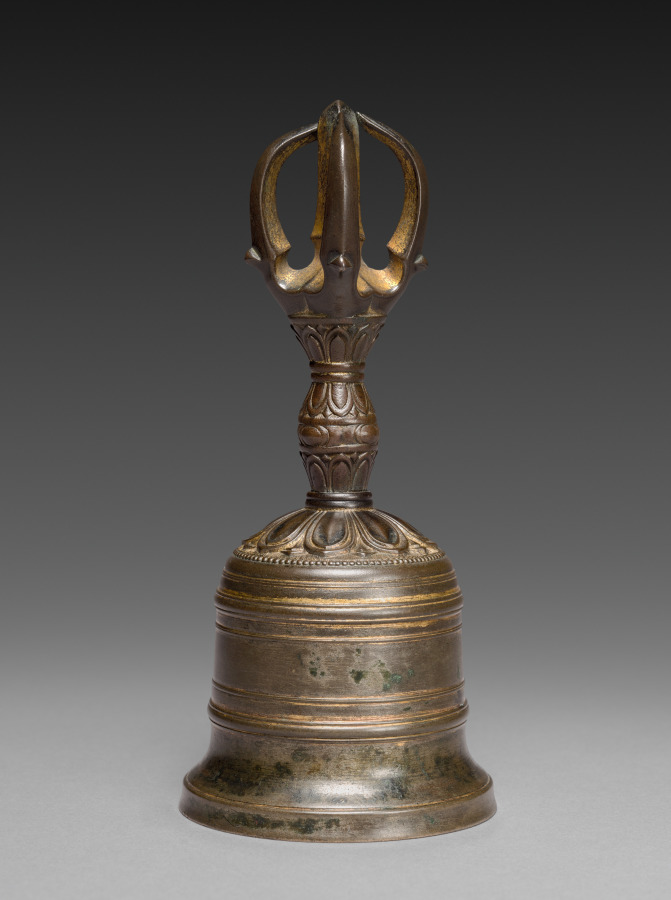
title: Five-pronged Vajra Bell (Gokorei)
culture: Japan, Kamakura period (1185–1333)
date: early 1300s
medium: gilt bronze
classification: Metalwork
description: The five prongs of this bell symbolize the Buddhist “Five Perfections”—generosity, morality, patience, perseverance, and concentration. The mouth of the bell symbolizes the “Sixth Perfection” of wisdom. The bell was used in Japanese Esoteric Buddhist rituals along with vajra pestles, or kongōsho.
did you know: Vajras are symbolic weapons, representing the properties of a diamond (indestructibility) and a thunderbolt (irresistible force), still used in Buddhist ceremonies today.